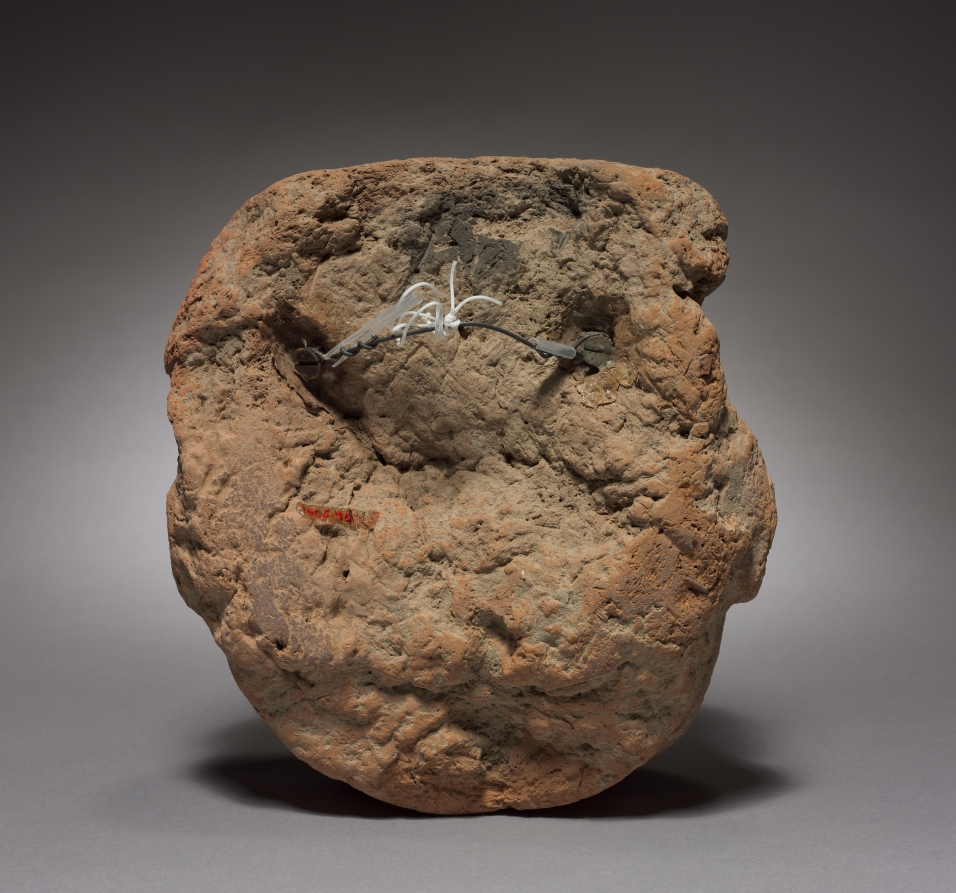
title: Architectural Sculpture Fragment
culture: Mexico, Oaxaca, Zapotec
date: c. 700–1000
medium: unfired clay, covered with painted stucco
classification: Ceramic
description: This architectural sculpture fragment probably once formed part of a tomb façade; technically similar sculptures have been found at the Zapotec site Lambityeco. Ancestral tombs were usually located beneath the courtyard of the family home and were often reused for successive generations. This image of a man wearing a feline mask over the lower face may portray a lineage founder.